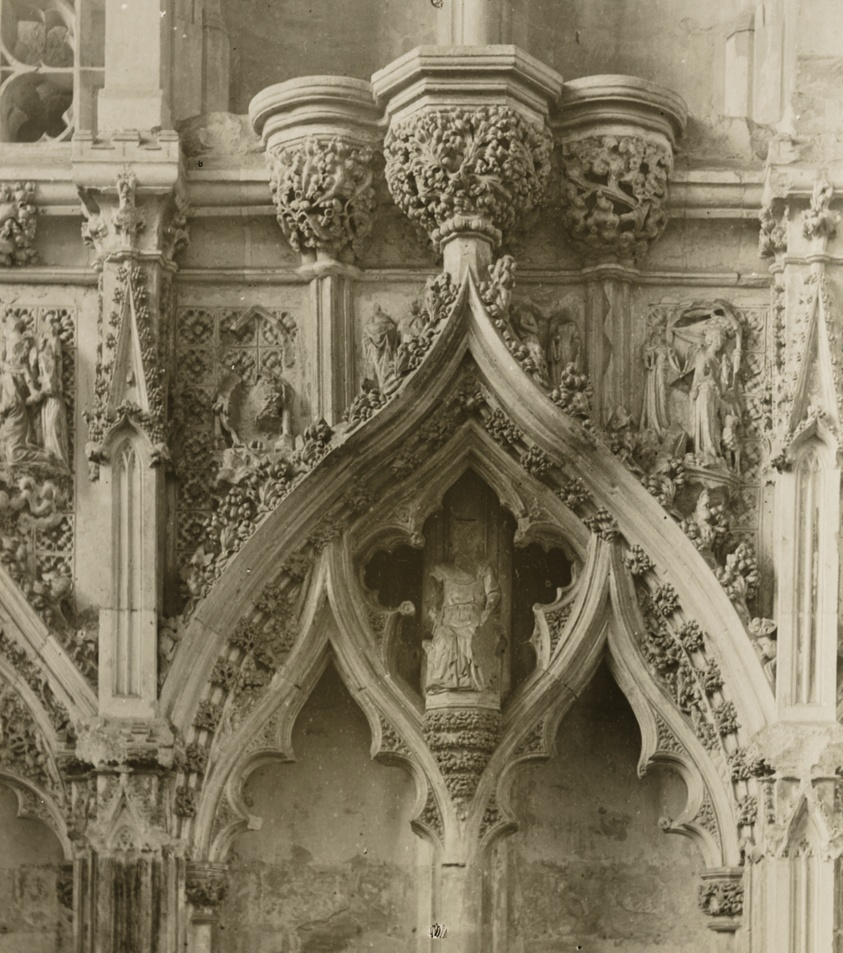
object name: Photograph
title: Ely Cathedral: Lady Chapel, Details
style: Pictorialism, 19th century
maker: Frederick H. Evans (English, 1853–1943)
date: c. 1891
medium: Lantern slide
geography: England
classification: photograph; photography